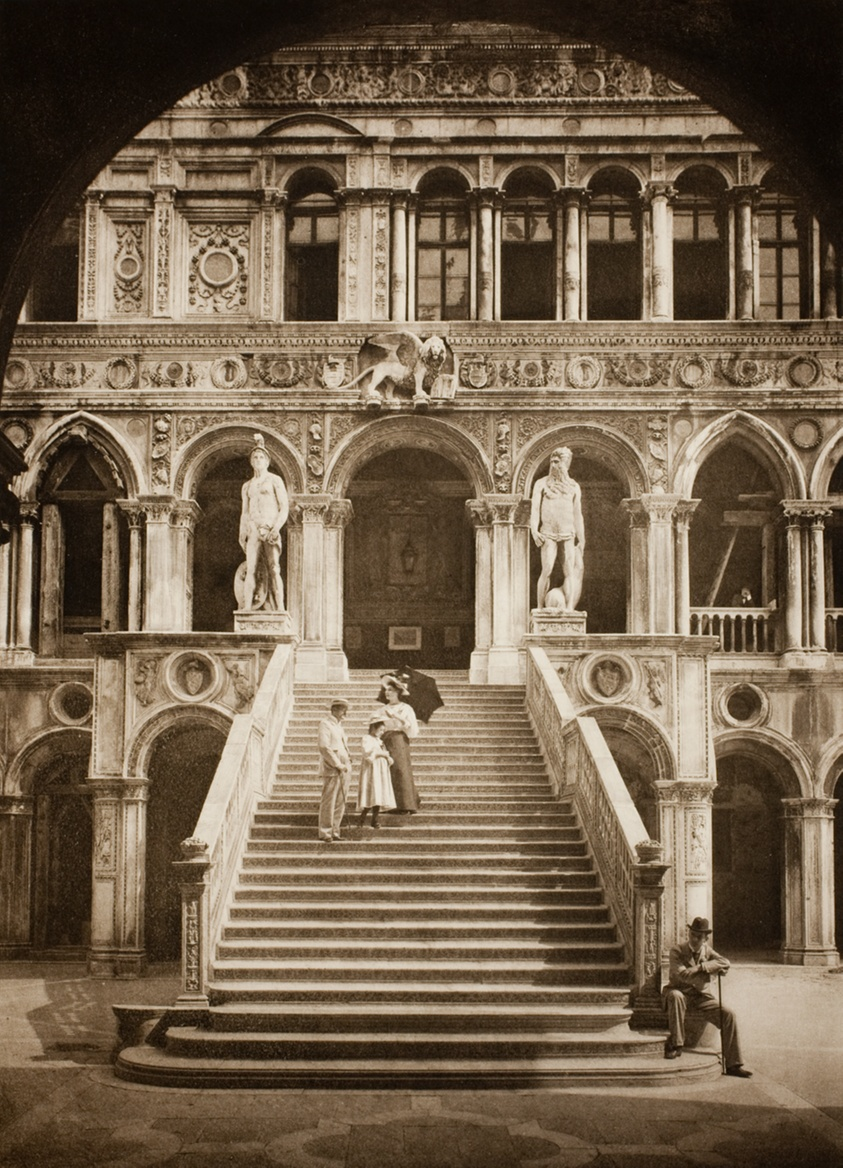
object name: Photograph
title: Untitled (II 58)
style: 19th century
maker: edited by Ferdinando Ongania; Italian, 1842–1911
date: c. 1890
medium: Photogravure, No. II 58 from the portfolio "Calli, Canali e Isole della Laguna"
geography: Italy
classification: photograph; photography